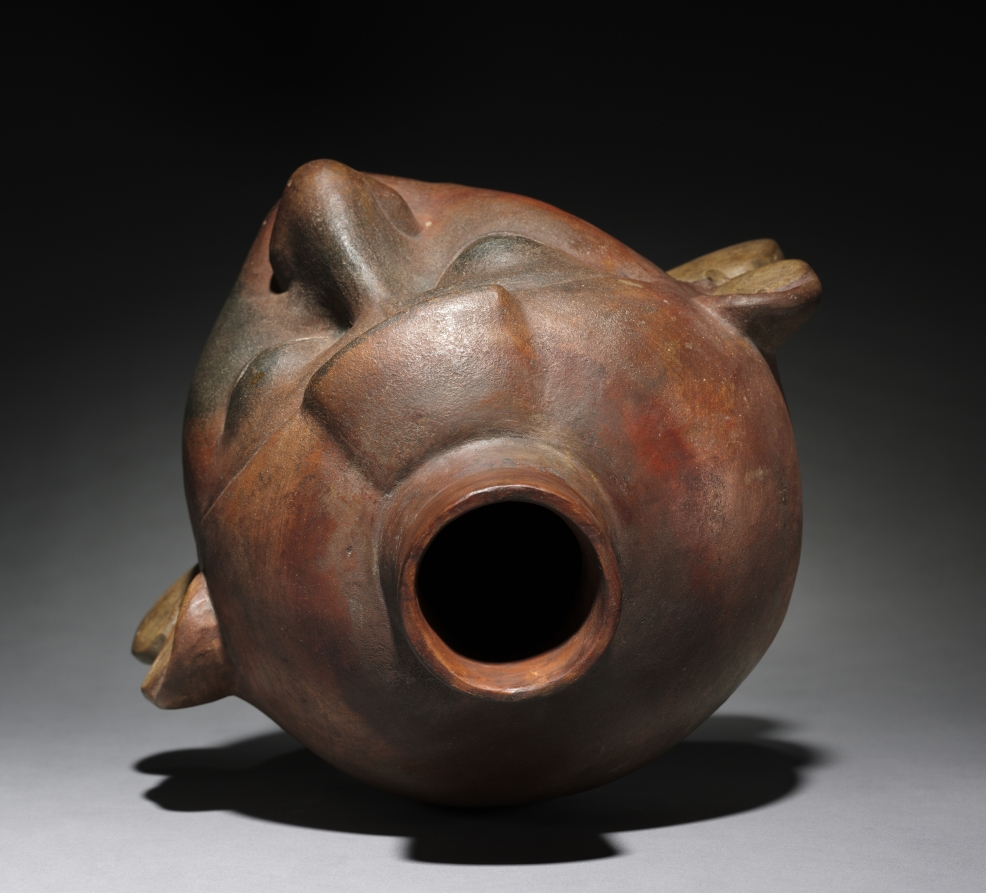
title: Portrait Head Vessel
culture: Peru, North Coast, Moche style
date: 200–550 CE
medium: earthenware with colored slips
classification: Ceramic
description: The Moche were unique in ancient Peru in creating realistic human portraits, usually in the form of ceramic vessels. This large example may represent an important captive who, like some Moche prisoner figures, wears double earrings and a hank of hair over the forehead.